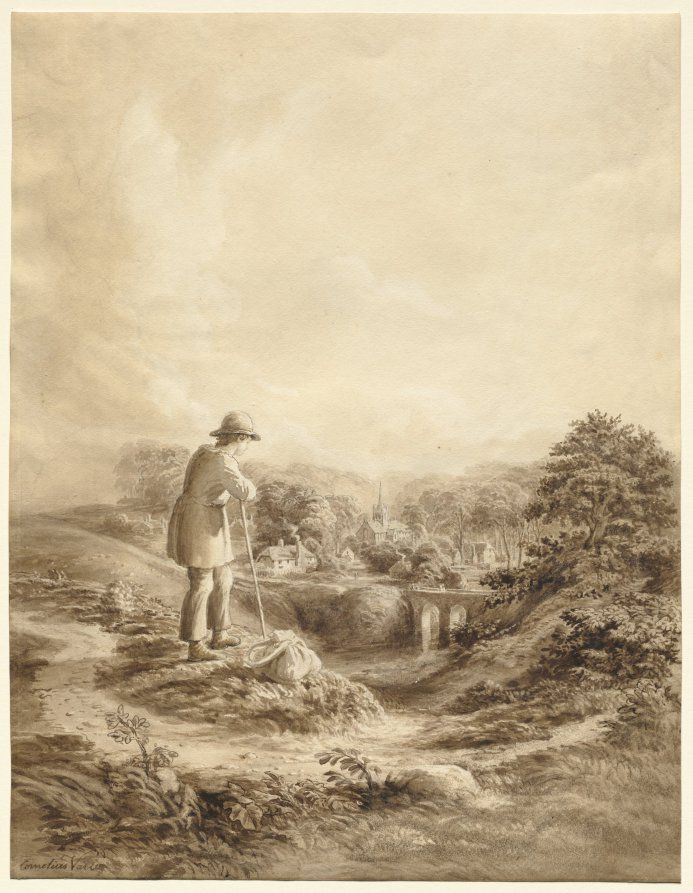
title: Landscape with Figure in Foreground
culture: England, 19th century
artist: Cornelius Varley (British, 1781–1873)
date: c. 1840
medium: brown ink and brown wash with graphite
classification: Drawing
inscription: signed in ink: Cornelius Varley; notes on verso in graphite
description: Primarily self-taught, Varley played a significant role in the development of open-air drawing practice in 19thcentury England. He relished the opportunity to engage directly with natural phenomena and made numerous sketches of the English landscape. Raised by his uncle who was a watchmaker, Varley combined his artistic interests with his exposure to science, and in 1809 invented a "graphic telescope," a drawing instrument loosely derived from the camera obscura. Varley’s drawings were more than mere transcriptions of nature, however. This drawing illustrates a stanza of Samuel Roger’s popular poem "The Pleasures of Memory": The adventuring boy that asks his little share And hies from home, with many a gossip’s prayer Turns on a neighboring hill once more to see The dear abode of peace and privacy; And as he turns, the thatch among the trees The smoke’s blue wreaths, ascending from the breeze, The Village Common scattered with white sheep All rouse reflection’s sadly pleasing train And oft he looks, and weeps, and looks again.